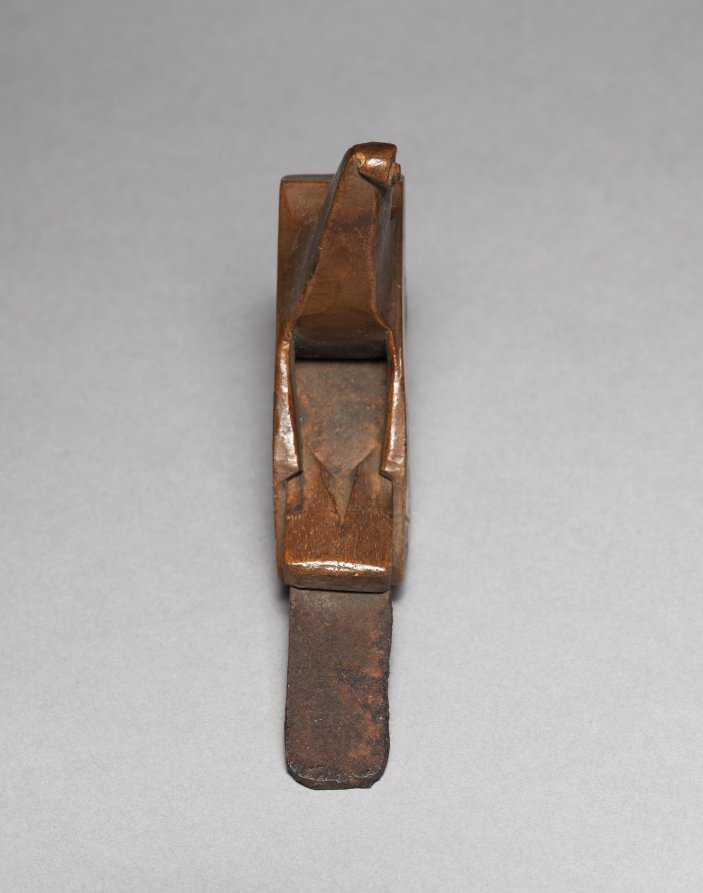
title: Plane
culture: Europe, 18th century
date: 1700s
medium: wood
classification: Tool